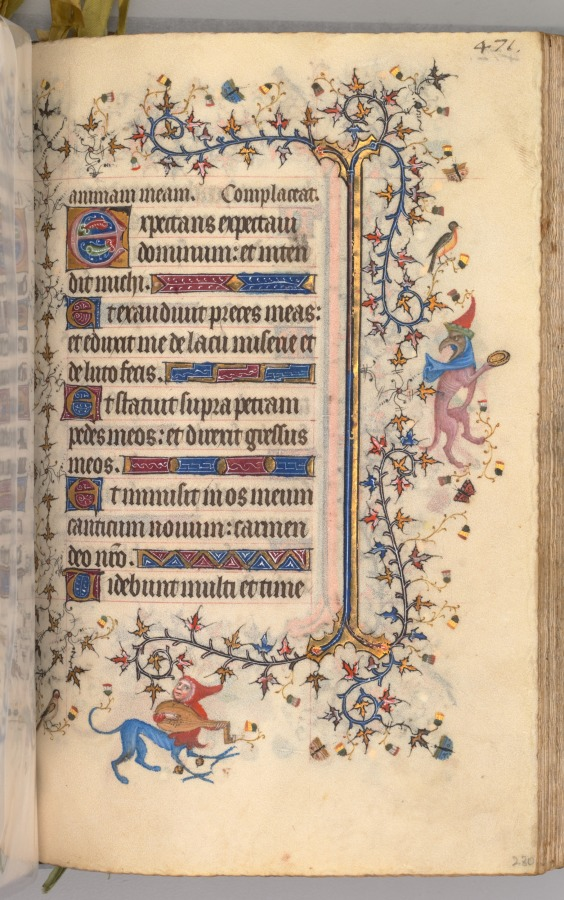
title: Hours of Charles the Noble, King of Navarre (1361-1425): fol. 230r, Text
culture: France, Paris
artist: Master of the Brussels Initials and Associates (French)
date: c. 1405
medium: ink, tempera, and gold on vellum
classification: Bound Volume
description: This precious volume was obviously highly prized by its owner, the French-born King of Navarre, who had his coat of arms painted on no less than twenty folios. Rather than directly commissioning this manuscript from a specific workshop, it seems that Charles the Noble acquired his book of hours -- perhaps ready-made for the luxury market -- while on a trip to Paris in 1404-05. A collaborative effort, six painting styles are evidenced within the pages of this codex, those of two Italians, two Frenchmen, and two Netherlanders. The painter who was responsible for the planning and decoration of the book, and who produced seventeen of the large miniatures, was a Bolognese artist known as the Master of the Brussels Initials. His principal assistant, responsible for most of the borders, was a Florentine who signed his name "Zecho" da Firenze on folio 208 verso.